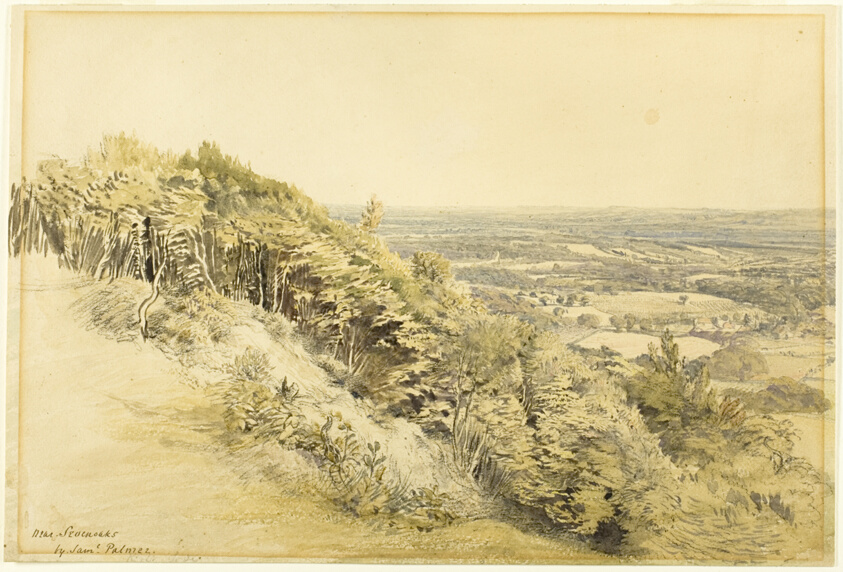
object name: Drawing and Watercolor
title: View from Wilmots Hill, Kent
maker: Samuel Palmer (English, 1805-1881)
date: 1830/1835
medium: Watercolor over black chalk on cream wove paper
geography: England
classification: watercolor; drawings (visual works); prints and drawing